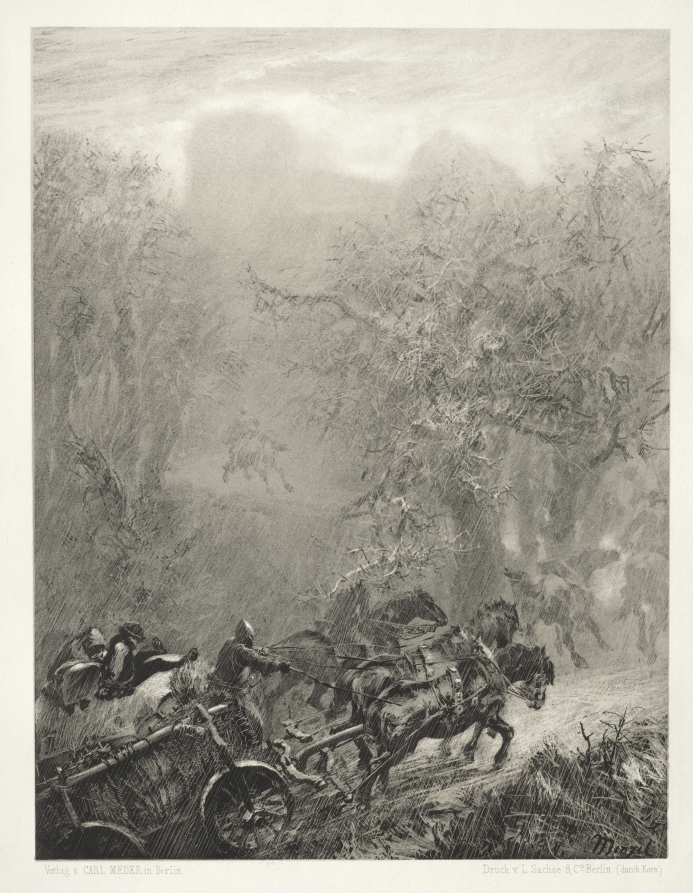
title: Essay on Stone with Brush and Scraper: The Convoy of Prisoners through a Woods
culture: Germany, 19th century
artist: Adolph von Menzel (German, 1815–1905)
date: 1851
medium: lithograph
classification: Print